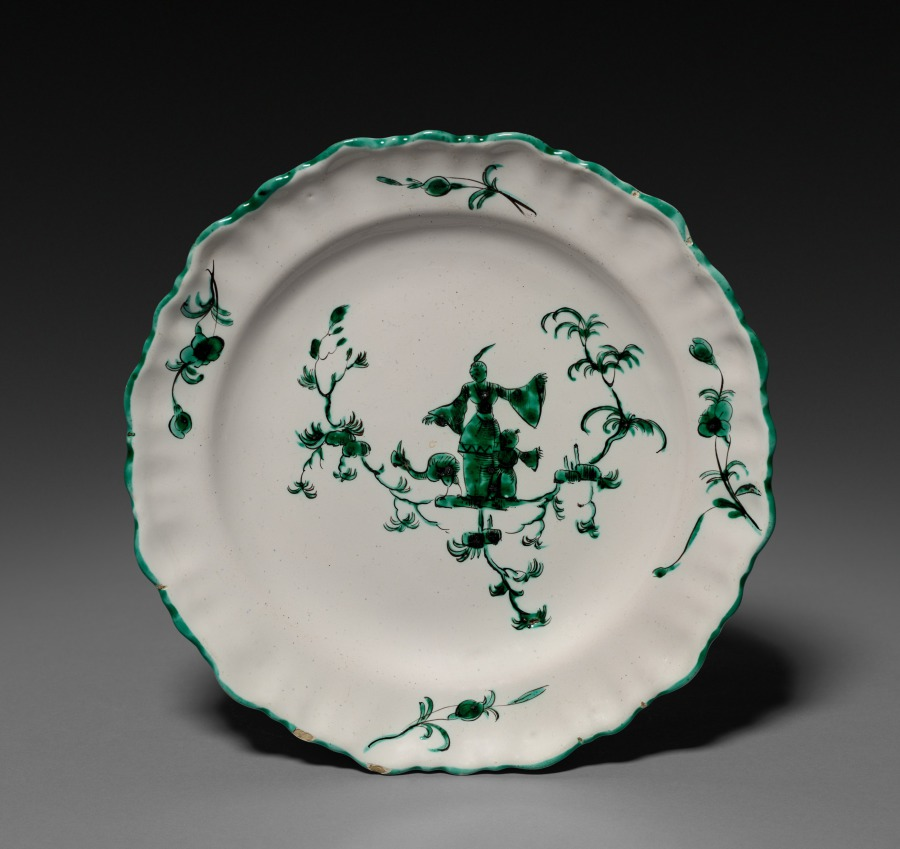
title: Plate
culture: France, Moustiers, 18th century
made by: Ferrat Factory (French)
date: c. 1775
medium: faience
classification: Ceramic